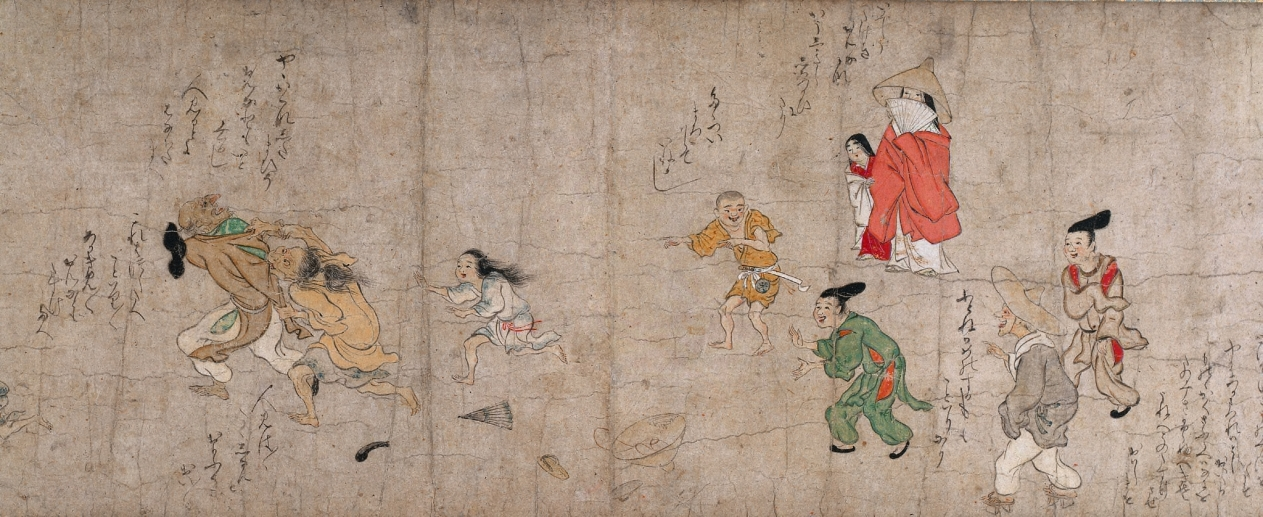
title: The Story of Fukutomi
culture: Japan, Muromachi period (1392–1573)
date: mid-1400s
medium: Handscroll; ink and color on paper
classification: Painting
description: This handscroll shows the second half of an odd tale in which a ne’er-do-well seeks the path to quick fortune and learns the art of musical flatulence. Prior to a major performance, a mentor (and competitor) advises him to consume morning glory seeds, a laxative. Thus, while performing he fouls himself and ends his days in humiliation. The audacious nature of this story and its presentation—well-animated figures with dialogue adjacent to the appropriate moments of action—create a primitive graphic novel. Japanese visual humor about farting preceded this story, but the satirical, mean-spirited twist in this tale suggests its intent was not merely to be humorous. The story was likely commissioned by court officials who disapproved of common performers rising to high positions, outflanking what was the accepted social order.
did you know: This scroll is treasured as the second oldest surviving version of this story.